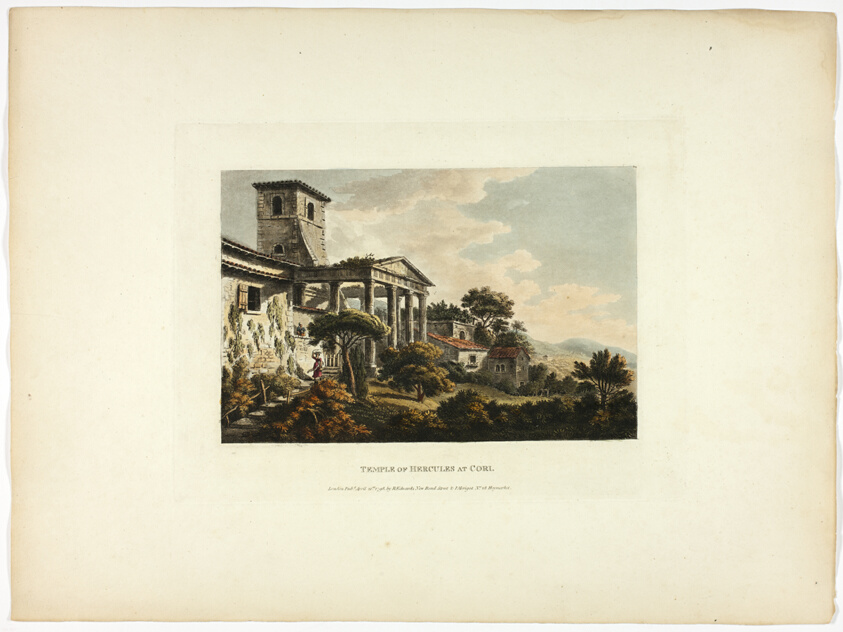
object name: Print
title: Temple of Hercules at Cori, plate thirty-two from the Ruins of Rome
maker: M. Dubourg, (English, active 1786-1838); published by J. Merigot (Italian, Unknown)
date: published April 21, 1798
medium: Hand-colored aquatint on paper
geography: England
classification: aquatint; print; prints and drawing